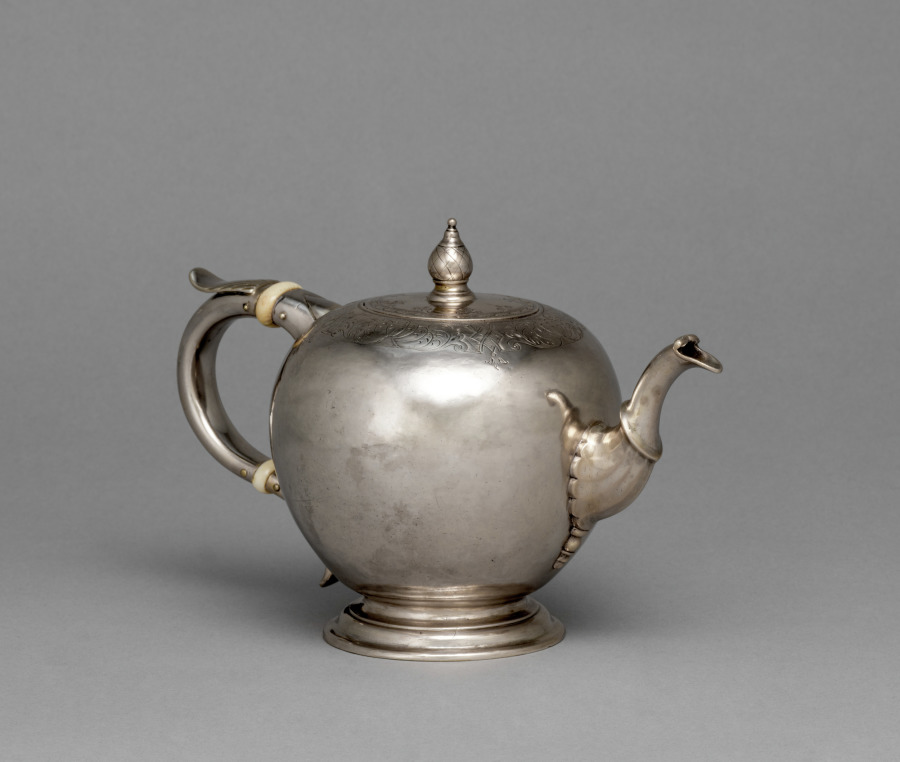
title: Teapot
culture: America, Massachusetts, Boston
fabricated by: Jacob Hurd (American, 1702–1758)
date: c. 1740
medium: silver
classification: Silver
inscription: engraved coat of arms of Whipple.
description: This teapot was made by Jacob Hurd, the father of Nathaniel Hurd whose portrait by John Singleton Copley is in gallery 204. The finial is probably not original to this teapot.